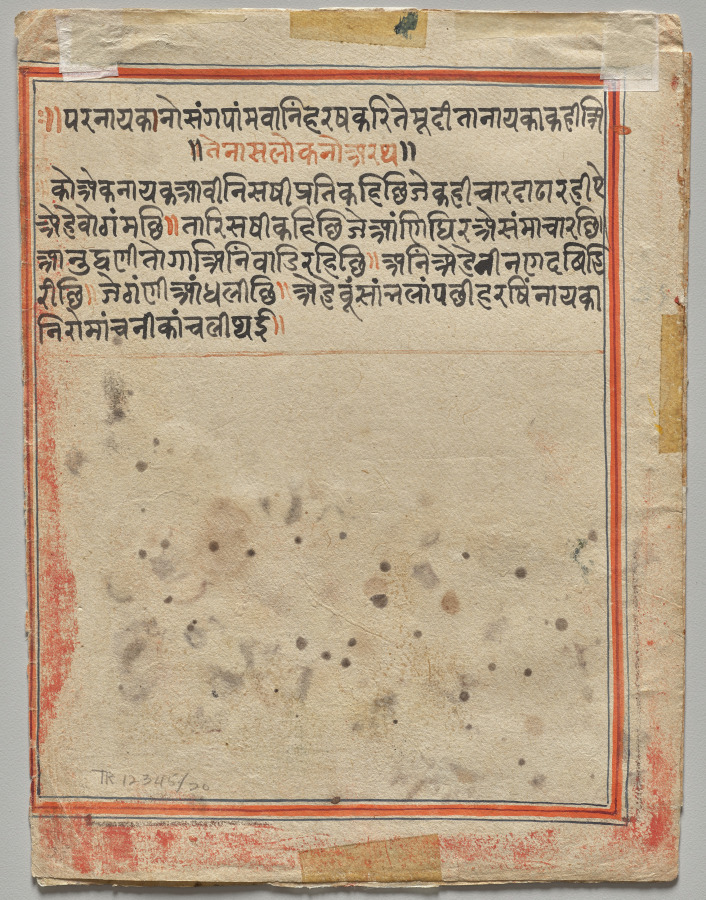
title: A Young, Angry Heroine, Folio 28 from a Rasamanjari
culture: Northwestern India, Rajasthan, Rajput Kingdom of Mewar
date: c. 1615–20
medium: Gum tempera, ink, and gold on paper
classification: Painting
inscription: Recto, upper center: You are expert in flirtation; you are charming; you are my lord and wonderful in your youthful handsomeness.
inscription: Recto, center: Madya Dhira Adhira.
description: The scene of a conversation between two lovers is set within a bedchamber, golden curtains pulled up. The heroine sits on the bed, with three long-necked wine vessels on the wall behind her. A brass ewer for washing with water is on the floor behind the bed.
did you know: Men applied fragrant black pastes to their underarms.